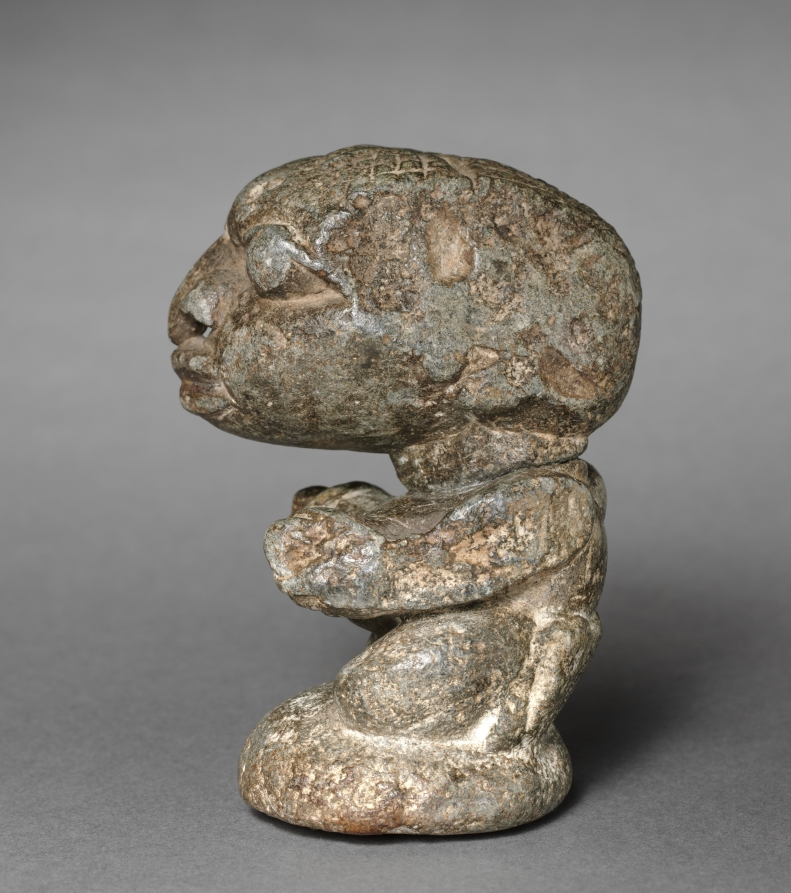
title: Female Figure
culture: Africa, West Africa, Sierra Leone, Sherbro-style maker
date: 1500s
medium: soapstone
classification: Sculpture